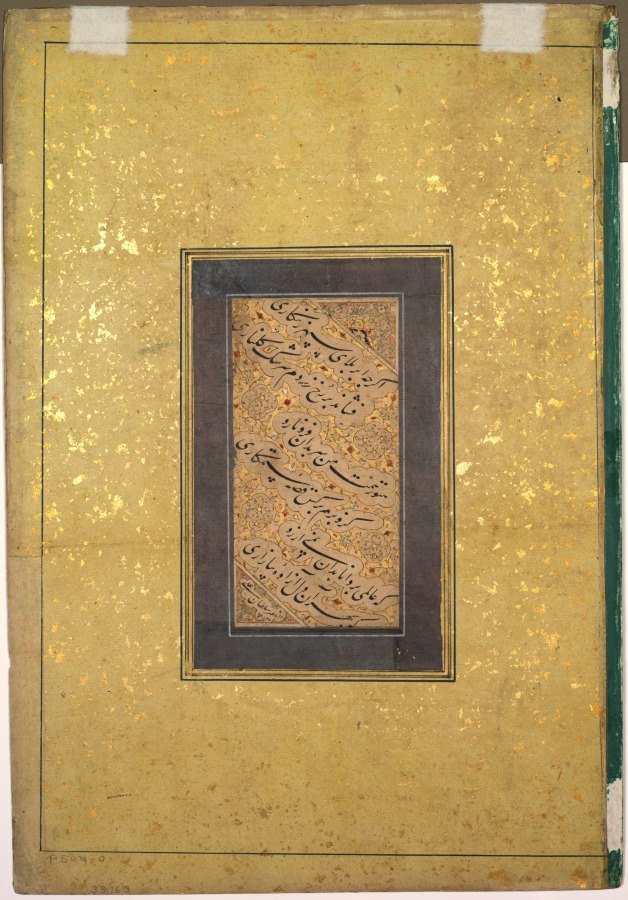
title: Nobleman Visiting Saint at his Shrine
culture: India, Mughal, 17th-18th century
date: 1600s–1700s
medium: color on paper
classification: Painting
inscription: recto, back of sultan: Ali of Mashad, d. 1504